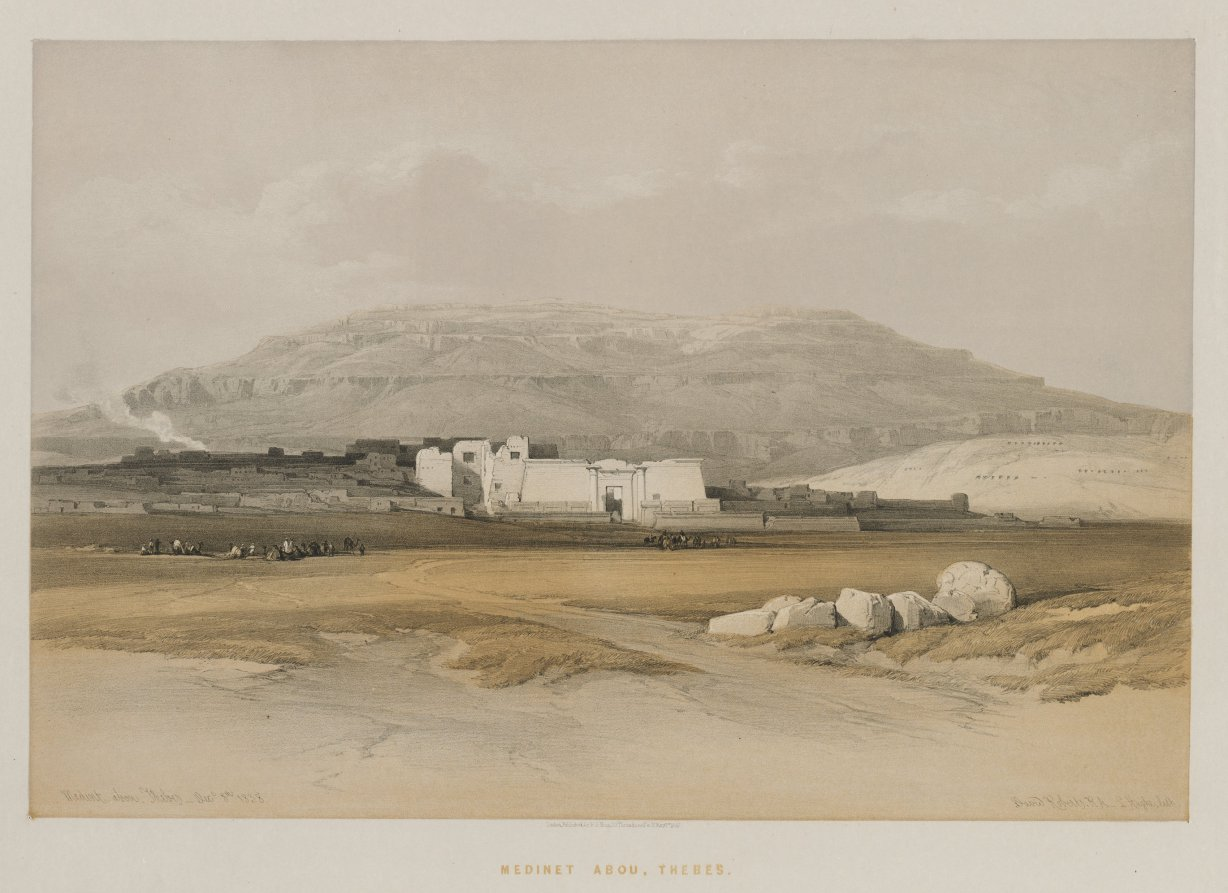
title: Egypt and Nubia, Volume II: Medinet abou, Thebes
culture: England, 19th century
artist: Louis Haghe (British, 1806–1885)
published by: F. G. Moon, 20 Threadneedle Street, London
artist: after David Roberts (Scottish, 1796–1864)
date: 1847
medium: color lithograph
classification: Print